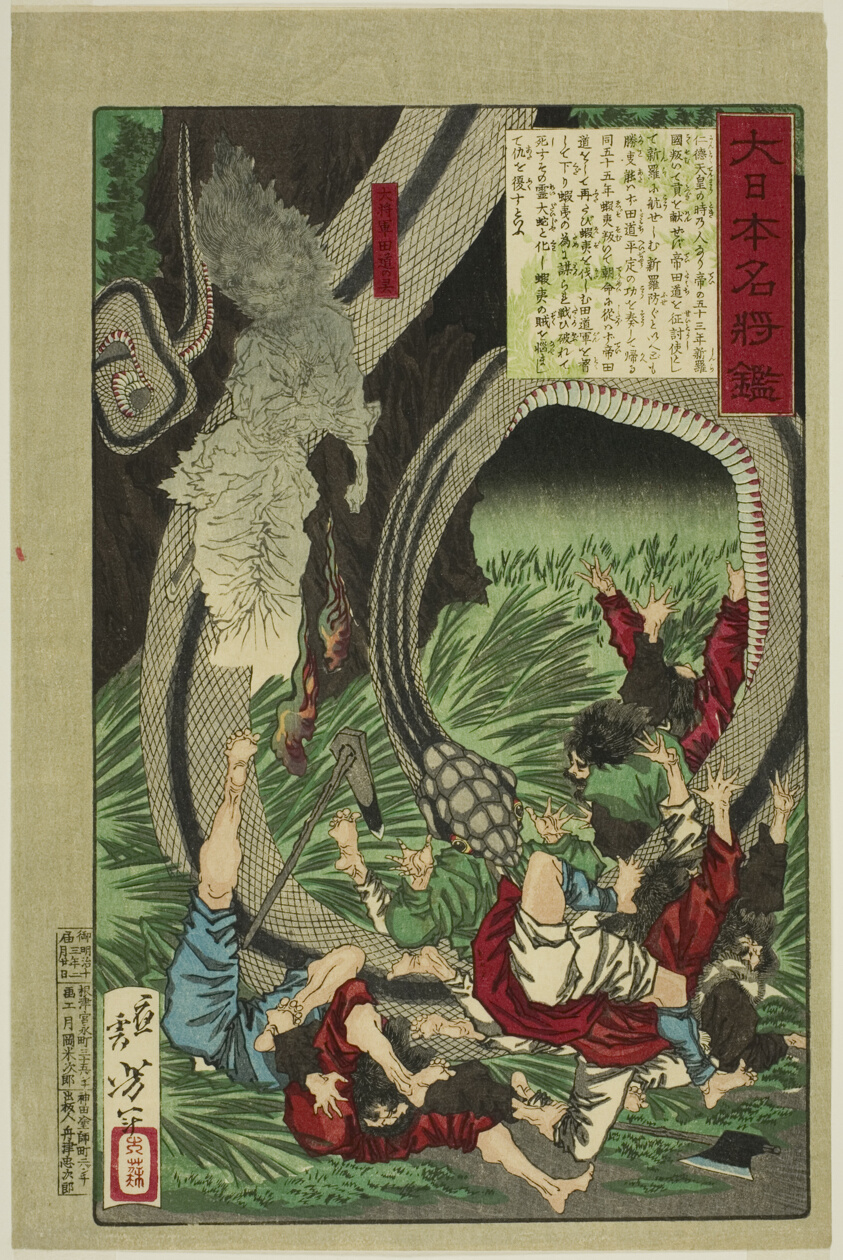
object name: Print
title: General Tamichi, from the series A Mirror of Famous Japanese Generals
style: Japanese (culture or style)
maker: Tsukioka Yoshitoshi (Japanese, 1839-1892)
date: 1880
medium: Color woodblock print; oban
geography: Japan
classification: woodblock print; print; asian art